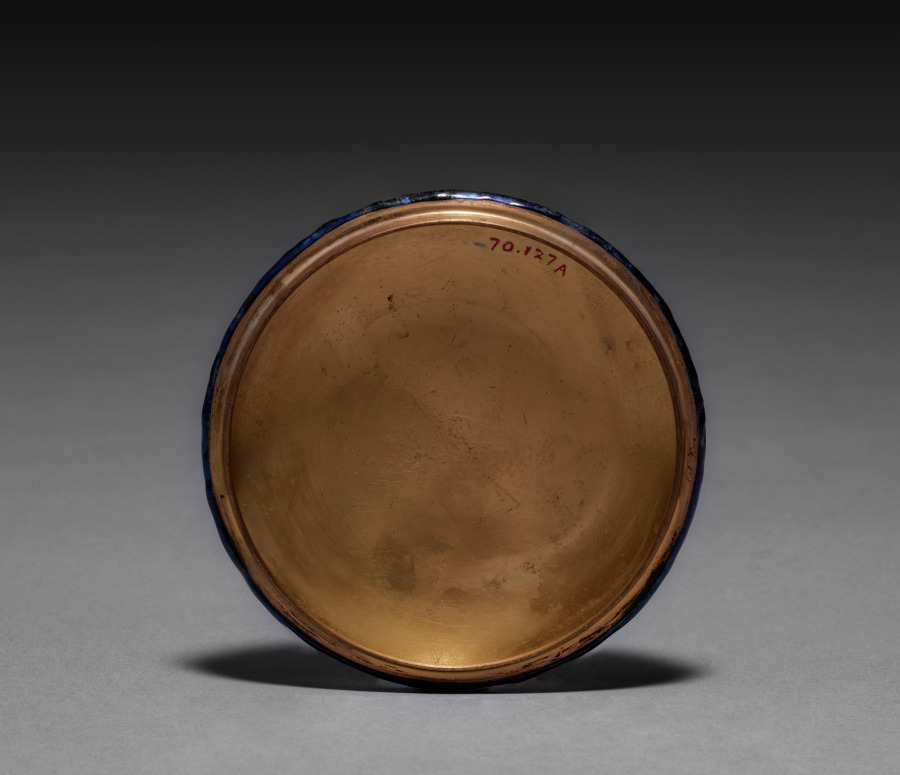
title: Cover for a Box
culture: America, New York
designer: Louis Comfort Tiffany (American, 1848–1933)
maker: Tiffany Glass & Decorating Company (America, New York, 1892–1902)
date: 1898–1901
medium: enamel on copper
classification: Glass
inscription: on bottom of glass box: 129 Louis C. Tiffany Favrile.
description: By 1900 Tiffany had expanded his empire by increasing the firm’s production of “fancy goods,” including inkstands, candlesticks, clocks, small boxes, desk sets, tea screens, and other functional objects. Along with the array of artistic glass designs from his factory in Corona, Queens, works in ceramic, bronze, other metals, and even jewelry abounded. These smaller, more affordable luxury items were designed with as much thought to artistry as the great stained glass windows and lamps through which the firm enjoyed unrivaled success.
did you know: Tiffany's artisans excelled at creating elaborate enameled patterns for luxurious accessories.